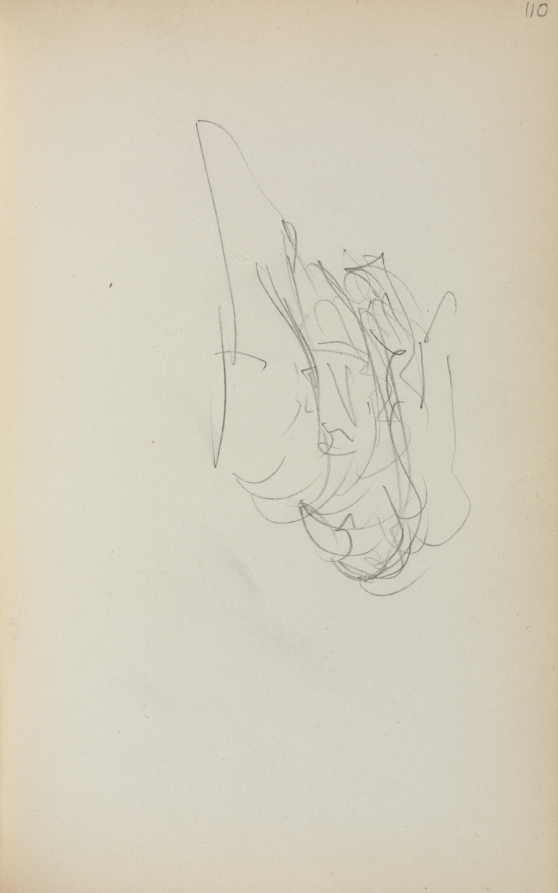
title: Italian Sketchbook: Gondola (page 110)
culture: America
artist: Maurice Prendergast (American, born Newfoundland [now Canada], 1858–1924)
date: 1898–1899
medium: pencil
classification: Bound Volume